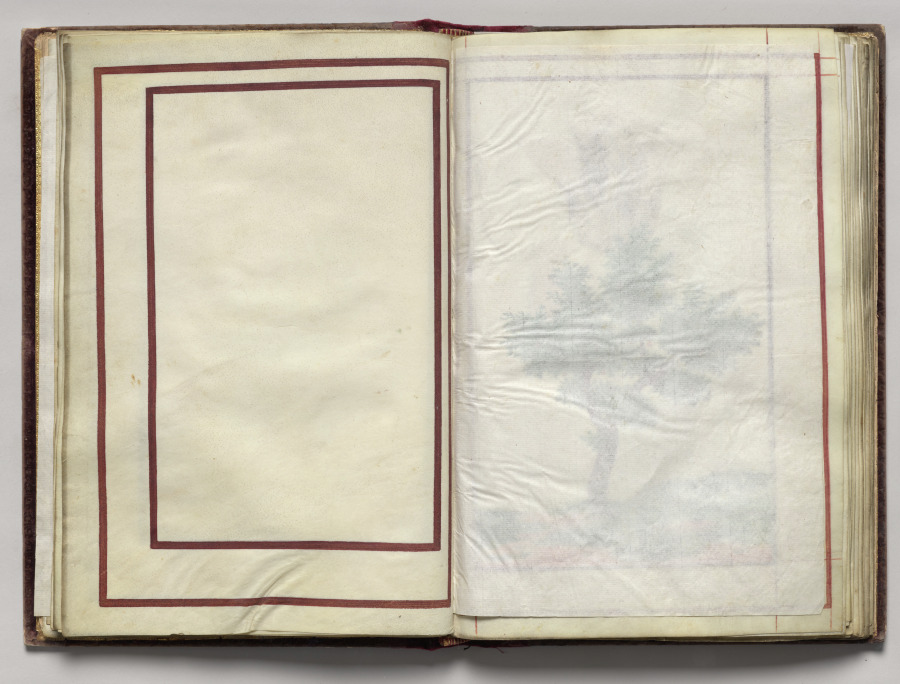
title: Border, folio 12 (verso), from Florilegium (A Book of Flower Studies)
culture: France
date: 1608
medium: watercolor, ink, silver and gold over occasional traces of pencil, on vellum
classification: Bound Volume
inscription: Dated: Poitiers 1608 (on frontispiece) Signed: On frontispiece in black ink, lower right: Van Kuyk Notation on drawing: Frontispiece: in pencil, lower margin: * élève de Van Kessel, peintre flammand (* in pencil also appears in front of Van Kuyk's name).